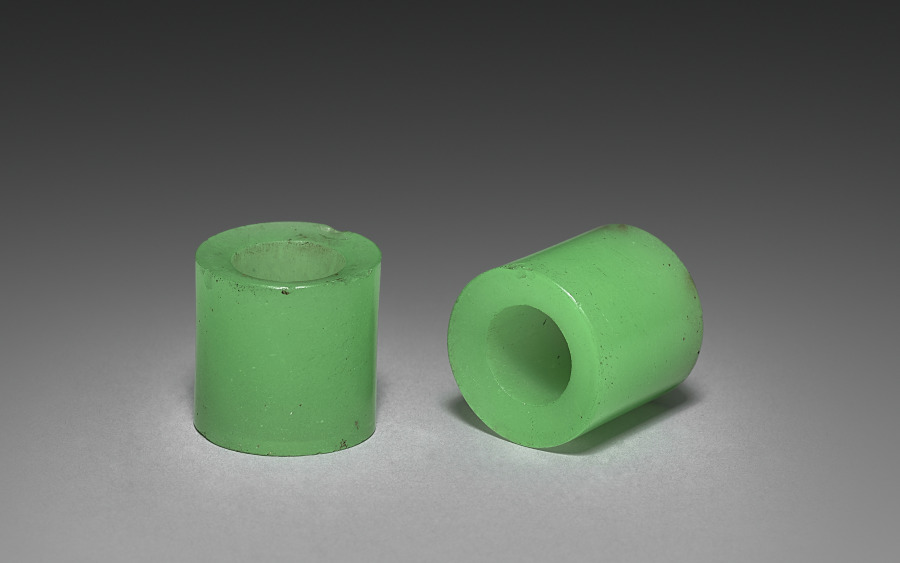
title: Pair of Earrings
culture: Burma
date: 1800s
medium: glass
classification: Jewelry